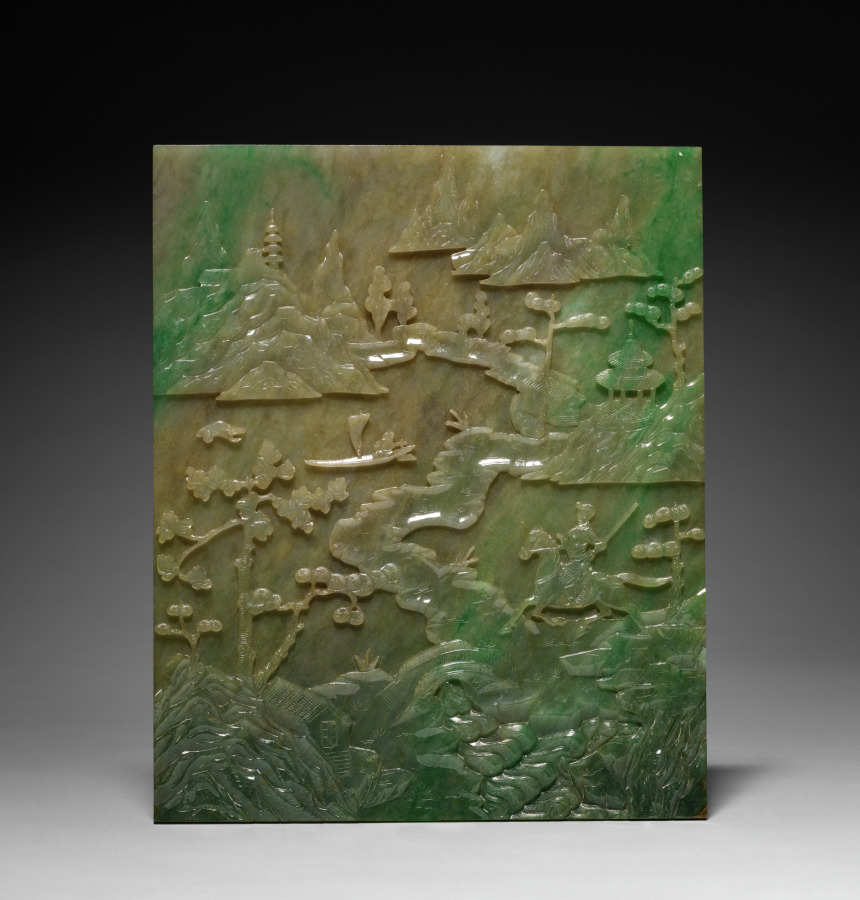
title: Table Screen with Stand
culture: China, Qing dynasty (1644-1911)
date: 1644–1911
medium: jade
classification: Jade